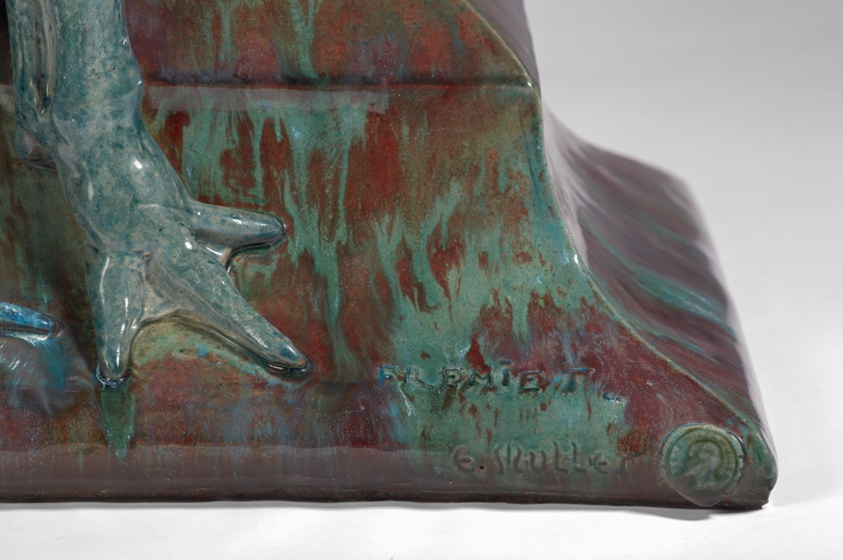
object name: Ceramics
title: Pelican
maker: Emmanuel Fremiet, French, 1824–1910; Made by Émile Muller et Cie, Ivry-sur-Seine, France, 1854–1908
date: c. 1896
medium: Glazed stoneware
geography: France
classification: sculpture; ceramics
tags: mythological figures, animals, bird, pelican, wings